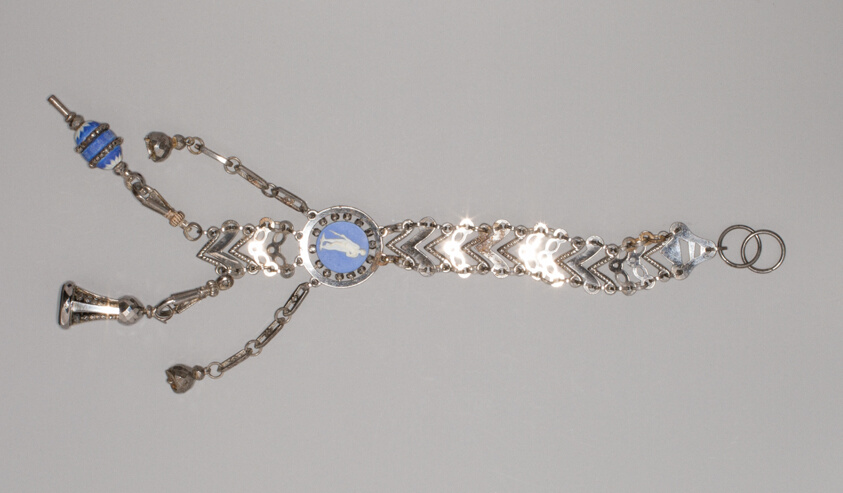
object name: Ceramics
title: Chatelaine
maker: Wedgwood Manufactory (England, founded 1759)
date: Late 18th century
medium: Stoneware (jasperware) and steel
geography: Burslem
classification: chatelaine; accessories (object genre); costume accessory worn at waist or below; costume accessory; stoneware; european decorative arts; ceramics